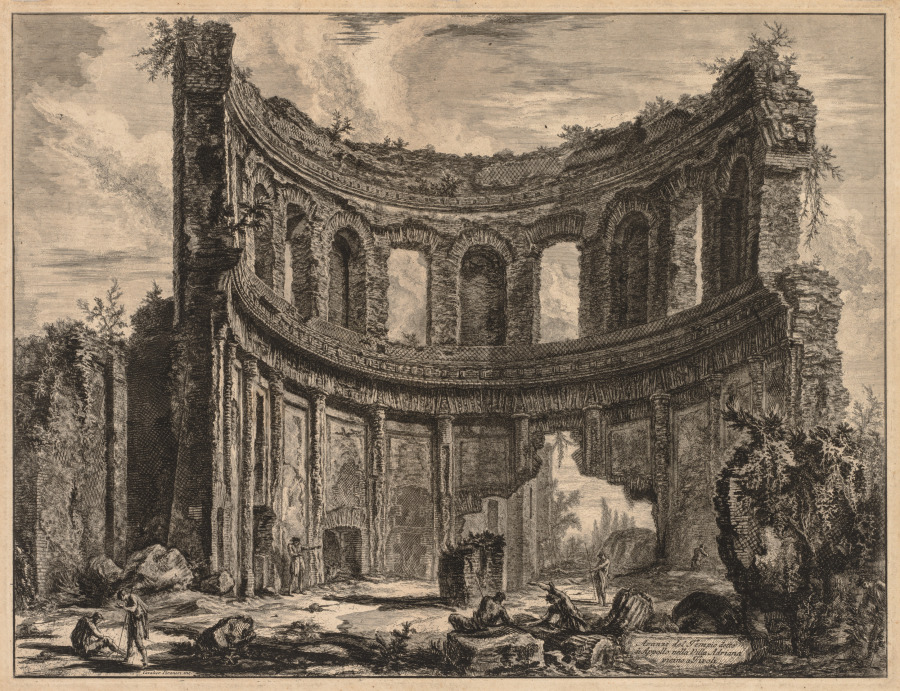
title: Views of Rome: Remains of the Temple of Apollo near Hadrian's Villa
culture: Italy, 18th century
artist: Giovanni Battista Piranesi (Italian, 1720–1778)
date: 1768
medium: etching and engraving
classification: Print